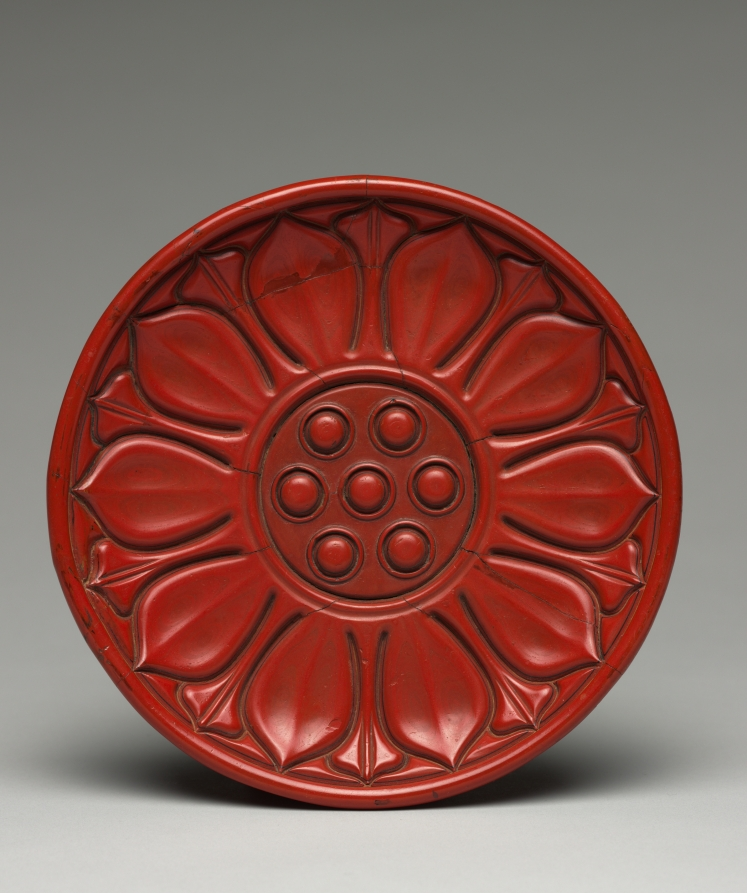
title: Lotus Dish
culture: China, Yuan dynasty (1271-1368)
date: 1271–1368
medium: Carved cinnabar-red lacquer on wood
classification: Lacquer